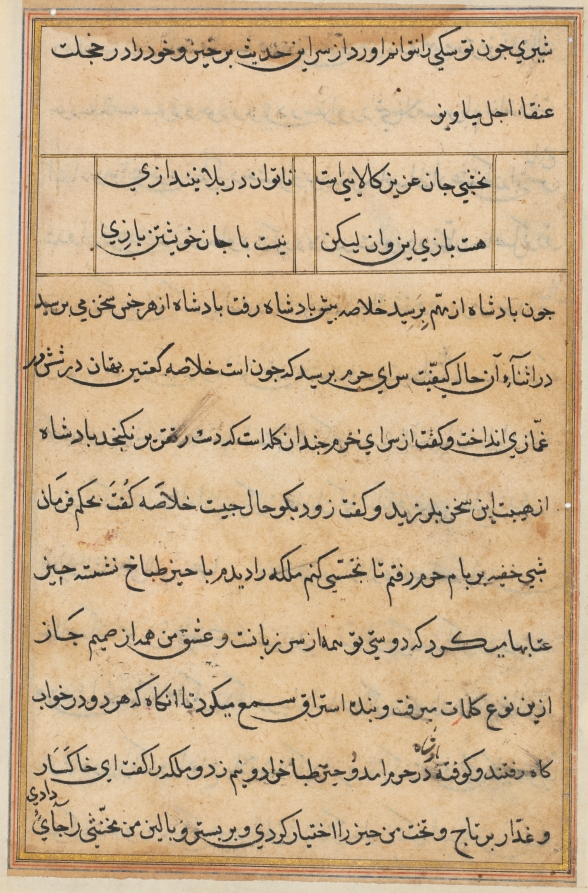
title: Page from Tales of a Parrot (Tuti-nama): text page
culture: Mughal India, court of Akbar (reigned 1556–1605)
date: c. 1560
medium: gum tempera, ink, and gold on paper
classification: Painting